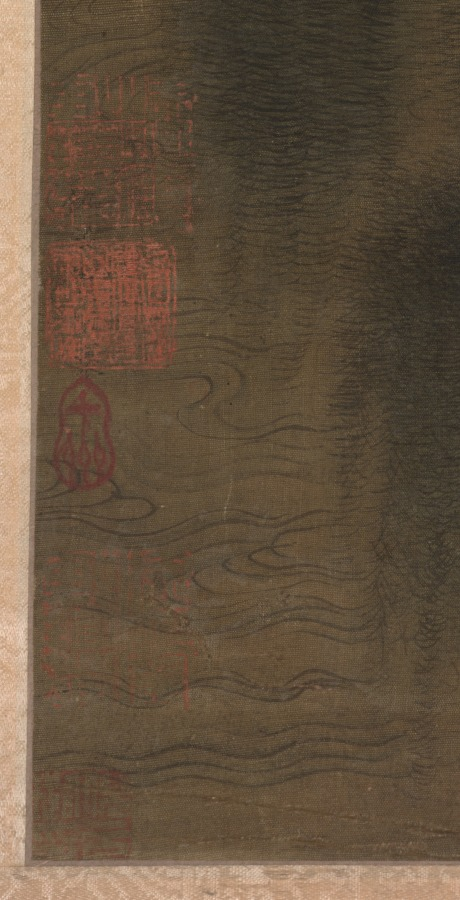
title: Court Ladies in the Imperial Palace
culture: China, Yuan dynasty (1271-1368)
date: 1271–1368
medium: hanging scroll, color on silk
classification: Painting